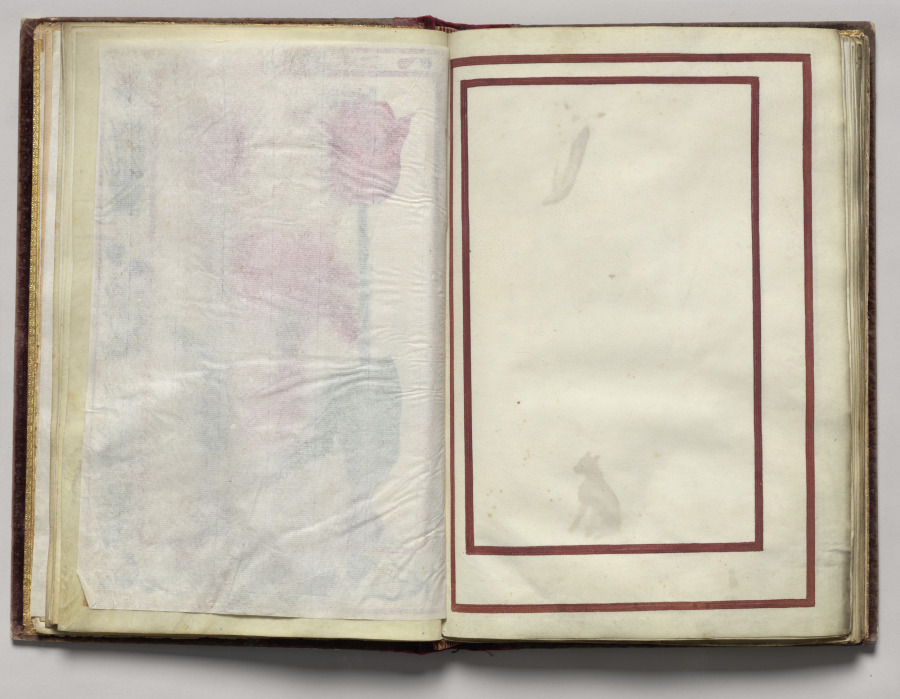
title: Border, folio 9 (recto), from Florilegium (A Book of Flower Studies)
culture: France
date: 1608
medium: watercolor, ink, silver and gold over occasional traces of pencil, on vellum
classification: Bound Volume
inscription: Dated: Poitiers 1608 (on frontispiece) Signed: On frontispiece in black ink, lower right: Van Kuyk Notation on drawing: Frontispiece: in pencil, lower margin: * élève de Van Kessel, peintre flammand (* in pencil also appears in front of Van Kuyk's name).